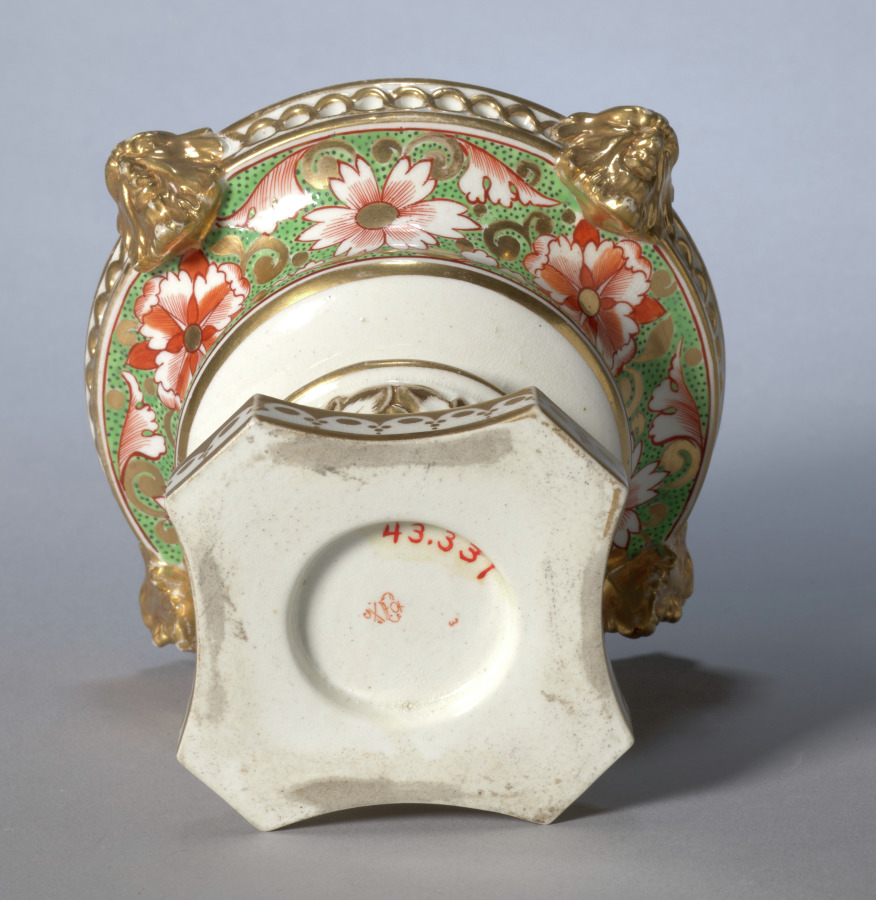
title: Potpourri Vase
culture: England, Derby, 19th century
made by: Derby (Crown Derby Period) (British)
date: c. 1810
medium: porcelain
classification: Ceramic